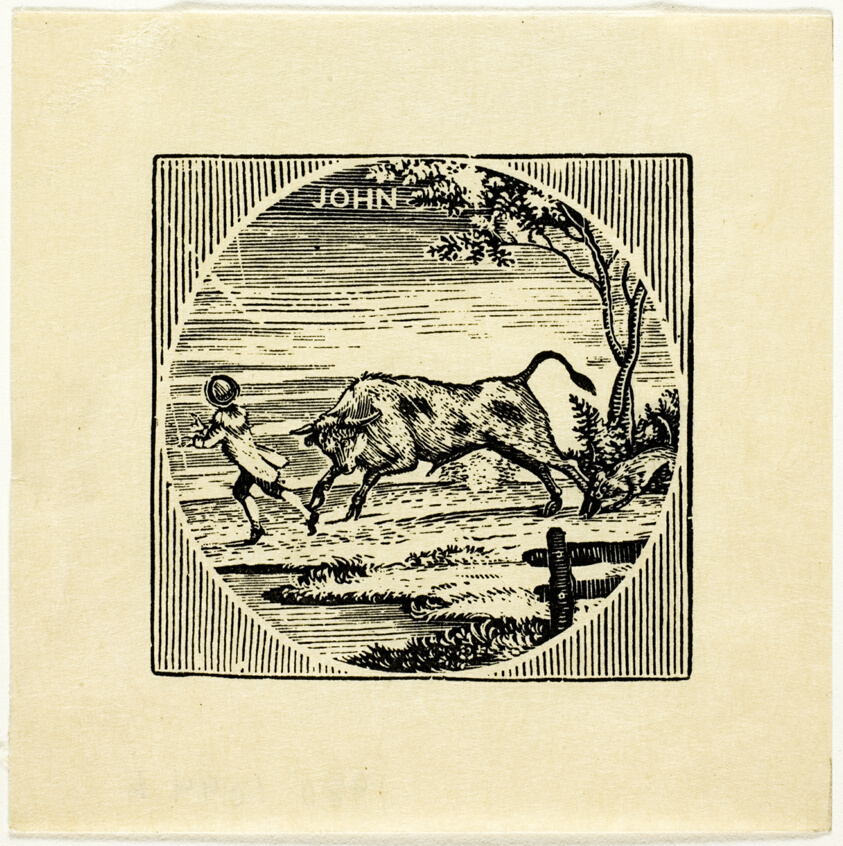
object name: Print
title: Book Illustration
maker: Thomas Bewick (English, 1753-1828)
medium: Wood engraving on paper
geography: England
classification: wood engraving; print; prints and drawing